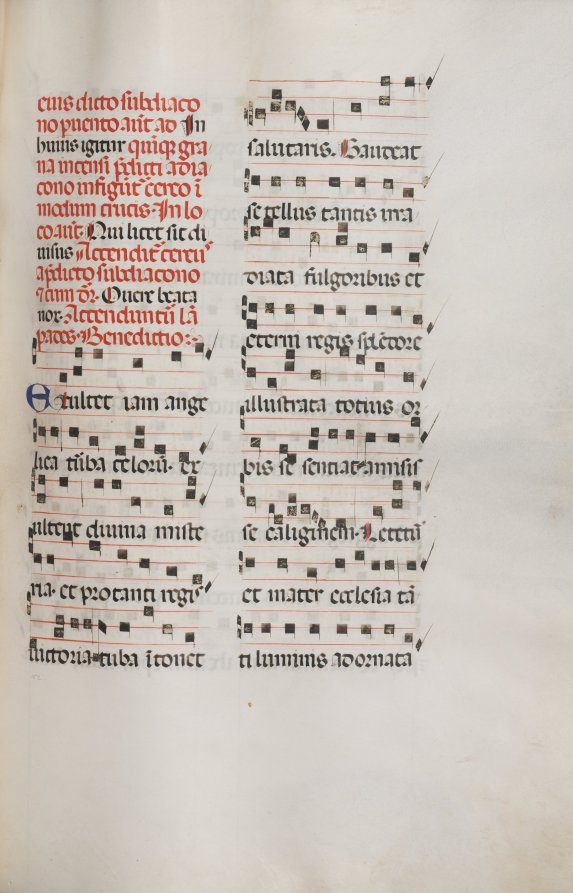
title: Missale: Fol. 153: Music for "Exultet"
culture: Italy, Perugia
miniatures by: Bartolommeo Caporali (Italian, c. 1420–1503)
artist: assisted by Giapeco Caporali (Italian, d. 1478)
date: 1469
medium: ink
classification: Bound Volume